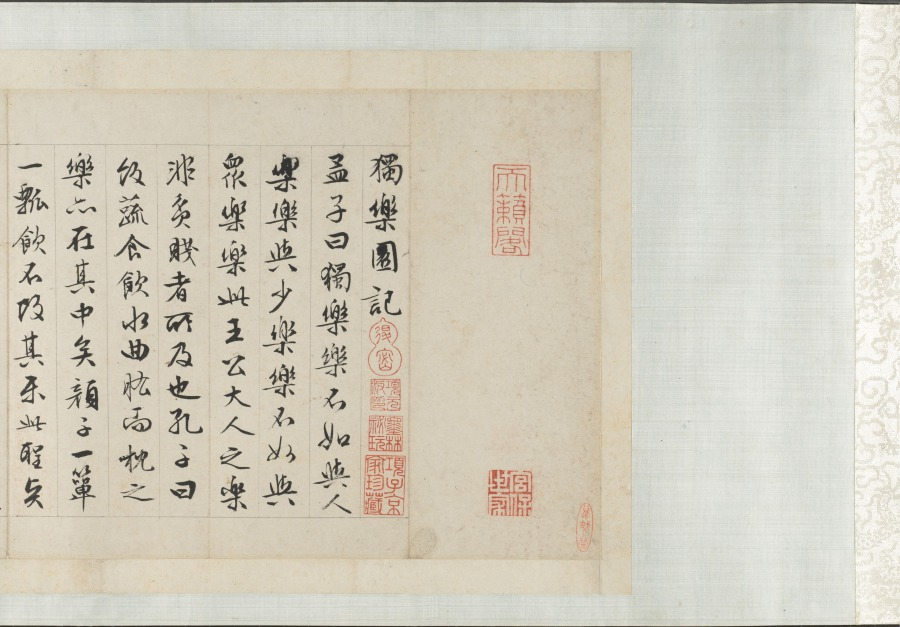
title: Garden for Solitary Enjoyment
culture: China, Ming dynasty (1368–1644)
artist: Qiu Ying (Chinese, 1494–1552)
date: 1515–52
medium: Handscroll; ink and light color on silk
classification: Painting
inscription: Accompanying text of an essay together with seven poems of Sima Guang (1019–1086) and one poem of Su Shi (1037–1101) written by Wen Zhengming (1470–1559) in 1558.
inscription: 2 colophons and 82 seals: 4 seals of Wen Zhengming 文徵明 (1470–1559); 59 seals of Xiang Yuanbian 項元汴 (1525–1590); 1 colophon, dated 1644, and 7 seals of Xiang Yukui 項禹揆 (c. late 1500s–1659); 1 colophon, dated 1880, and 2 seals of Weng Tonghe 翁同龢 (1830–1904); 2 seals of Ch'eng Chen-i (19th c.); 1 seal of Han Ch'ung (19th c.); 4 seals of Wan-go H. C. Weng 翁萬戈 (1918–2020); 3 seals unidentified.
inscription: Colophon by Xiang Yukui 項禹揆 (c. late 1500s–1659): The painting of The Garden for Self-enjoyment on the right by Shih-chou, Mr. Qiu [Qiu Ying] is in the style of Li Lung-mien. Its mood is peaceful, as if meeting the ancient gentlemen face to face among the brushes and silk; it lifts one above the sordid bustle of life. Formerly, my late father handed me this scroll which had only the painting without the written essay. I considered asking a good calligrapher to write the essay to add to it but was afraid that the quality of the writing would not match the painting. Several years later, I saw at a friend's house this essay and poems (of Ssu-ma Kuang] written by Hengshan [Wen Zhengming], once owned by my grandfather; so I spared no expense to obtain it. I rejoiced at this and said: "The divine swords are finally united. How things are pre-destined!" Now my friend Chang Kung-chao's technique for mounting [painting and calligraphy] is excellent. Therefore by daring to take them out and join them together, I can preserve this beautiful story of singular reunion. Xiang Yukui recorded at Hai-yeh-t'ang [hall] two days before New Year's Eve in the jiasheng year of the Chongzhen era [1644]. trans. LYSL/HK/WKH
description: Garden of Solitary Enjoyment refers to a site built in 1073 by the statesman Sima Guang (1019–1086) after he had retired to Luoyang, Henan province. Every spring, visitors would flock to his garden. Each of its seven structures references a historic figure. Sima wrote: I channel streams [like Du Mu], to water flowers [like Bai Juyi], or trim bamboo [like Wang Huizhi]. . . . I know of no joy between heaven and earth that could take its place. Qiu Ying’s painting, created after an 11th-century version of the same theme, must have appealed to garden owners of the Ming dynasty, since it became the template for numerous Suzhou workshop copies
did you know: Sima Guang completed his monumental survey of Chinese history, Zizhi tongjian, in the garden depicted in this painting.